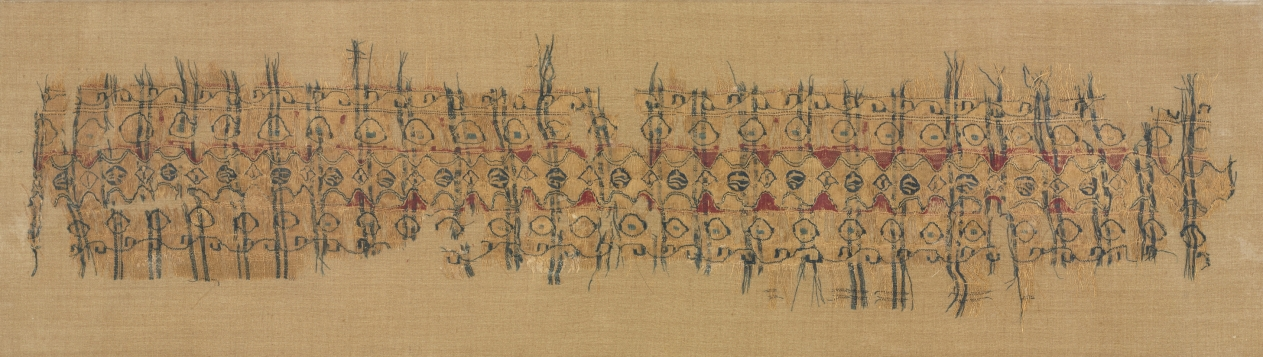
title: Plaid tiraz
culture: Egypt, Fatimid period, reign of Caliph al-Amir or al-Hafiz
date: 1101–1149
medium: plain weave with inwoven tapestry weave: linen and silk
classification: Textile